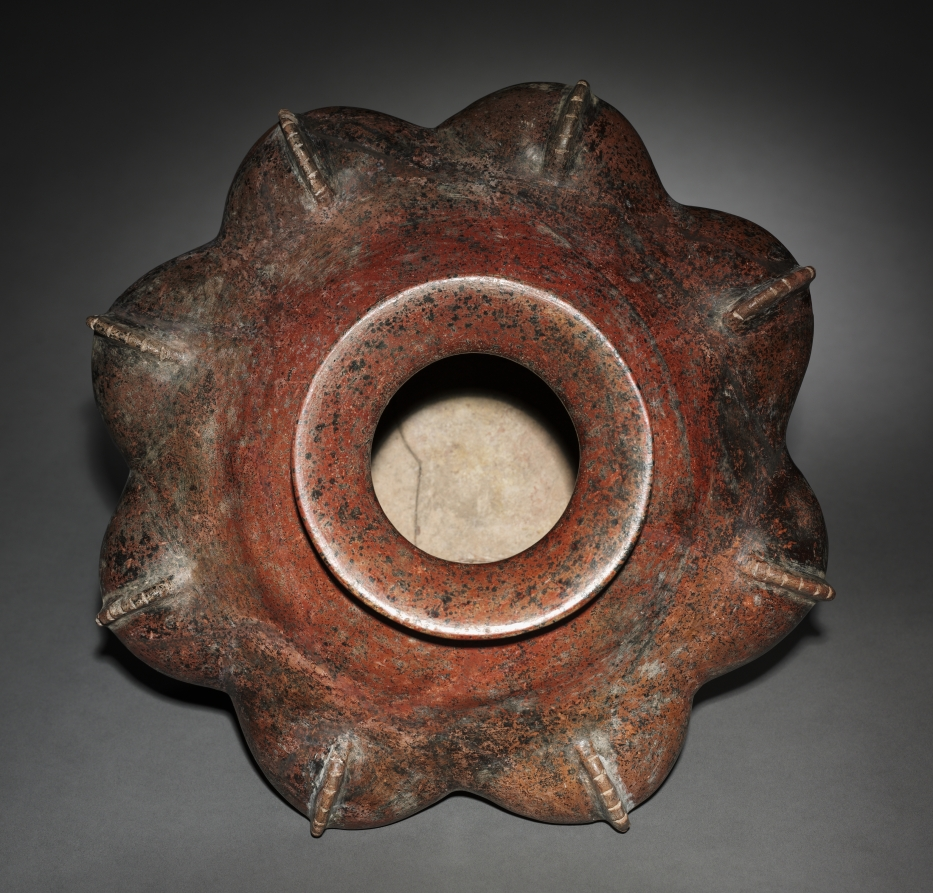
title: Vessel with Crested Heads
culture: West Mexico, Colima, Comala style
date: 200 BCE–300 CE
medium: earthenware with colored slip, black burial deposits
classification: Sculpture